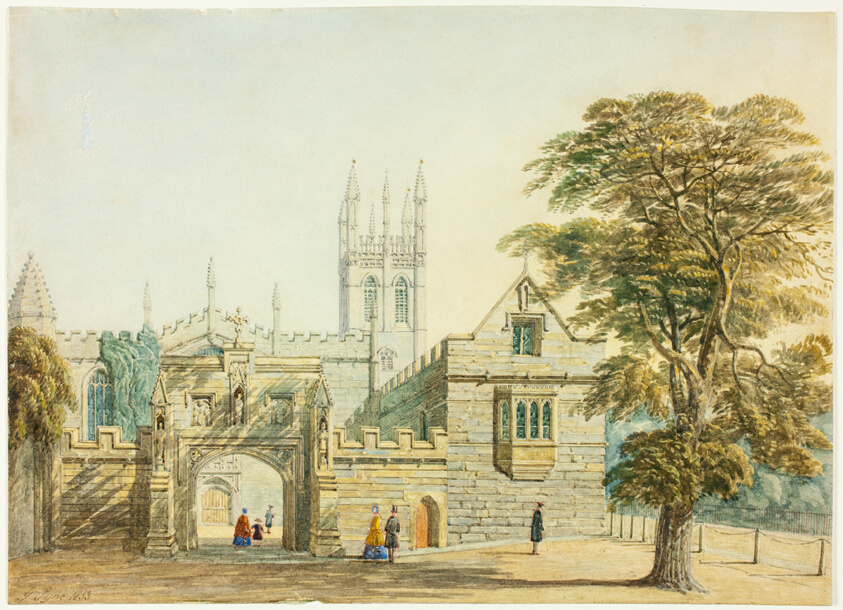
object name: Drawing and Watercolor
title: Magdalen College and Tower, Oxford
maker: George Pyne (English, 1800-1884)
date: 1853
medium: Watercolor over graphite on cream wove paper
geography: England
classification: watercolor; drawings (visual works); prints and drawing